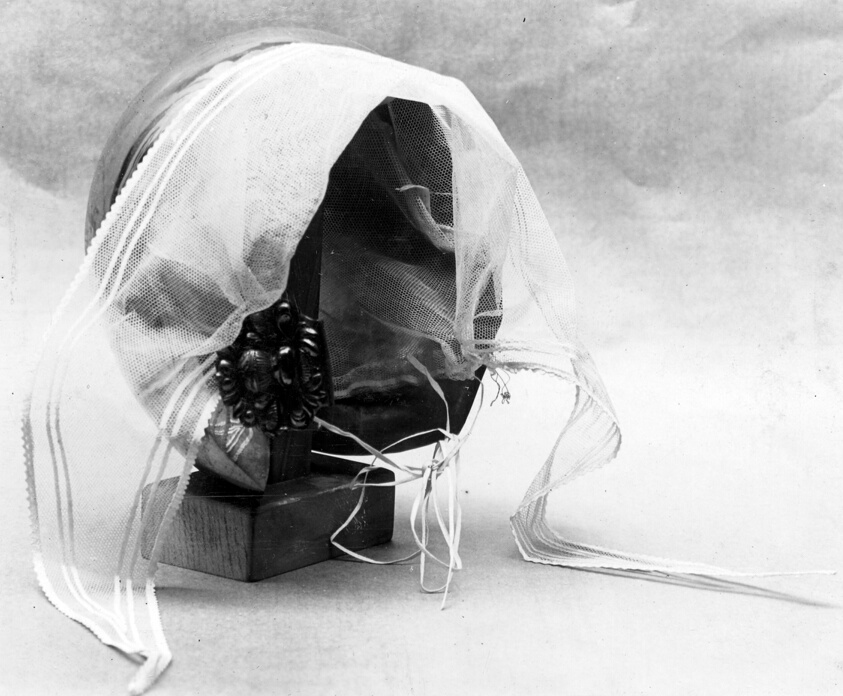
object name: Textile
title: Headdress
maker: Netherlands, Friesland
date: 17th century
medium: Silver gilt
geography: Netherlands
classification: textile; headdress - misc; costume accessory - headdress; costume; dress (garment); clothing